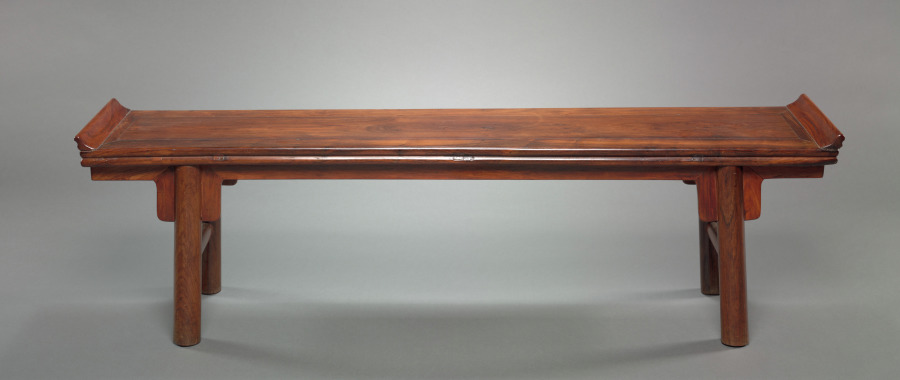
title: Low Table (Anji)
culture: China, Ming dynasty (1368–1644)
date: 1500s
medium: rosewood (huanghuali)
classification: Furniture and woodwork